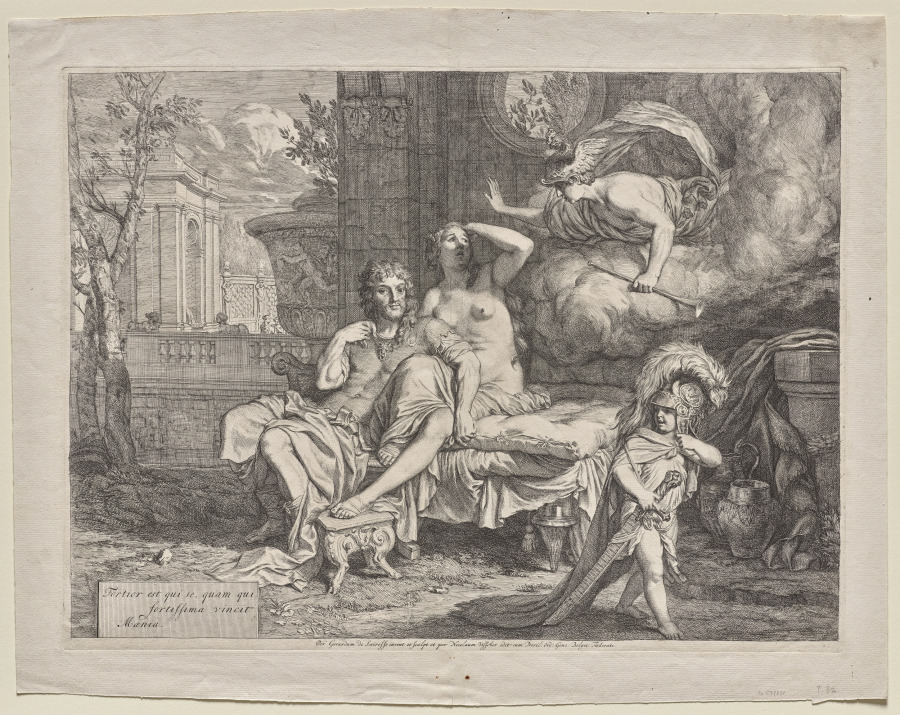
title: Mercury Orders Calypso to Allow Ulysses Depart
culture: Netherlands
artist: Gerard de Lairesse (Flemish, 1641–1711)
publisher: Nicolaes Visscher (Netherlandish, 1649–1702)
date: c. 1670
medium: etching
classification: Print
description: In Homer’s Odyssey, Odysseus spends seven years captive to the nymph Calypso. Despite Calypso’s charms, Odysseus longed to return home to his family. In this composition, De Lairesse depicts the moment when the Olympian gods intervene, sending Hermes to release Odysseus from Calypso’s captivity. The Dutch De Lairesse brought French artistic taste to the Netherlands, reflected here in the firmly modeled, idealized figures and classical architecture.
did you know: A painting by this artist of the same subject is also in the museum’s collection (see 1992.2).